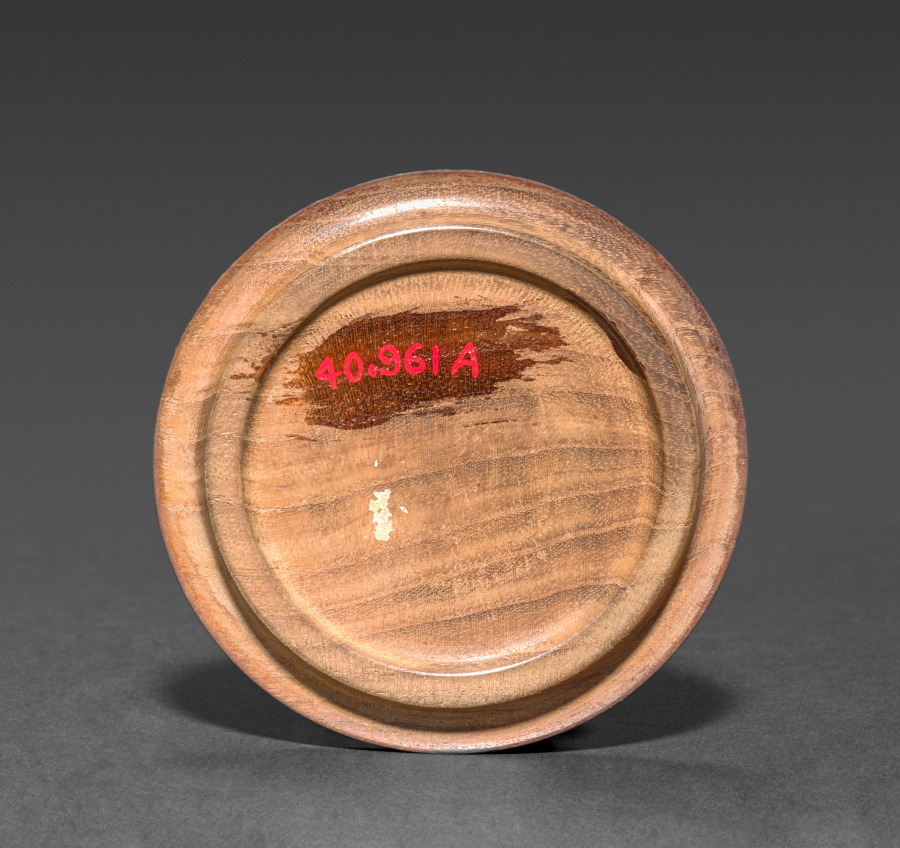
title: Jar with Wooden Cover (lid)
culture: Japan, Edo period (1615–1868)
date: 1700s-1800s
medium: pottery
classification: Ceramic